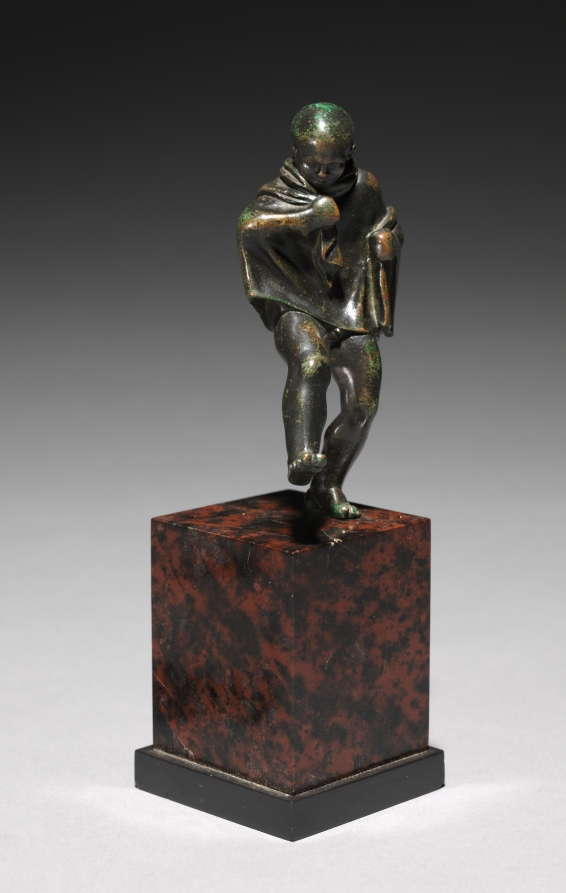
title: Dancing Boy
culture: Northern Italy, early 16th century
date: c. 1500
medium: bronze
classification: Sculpture